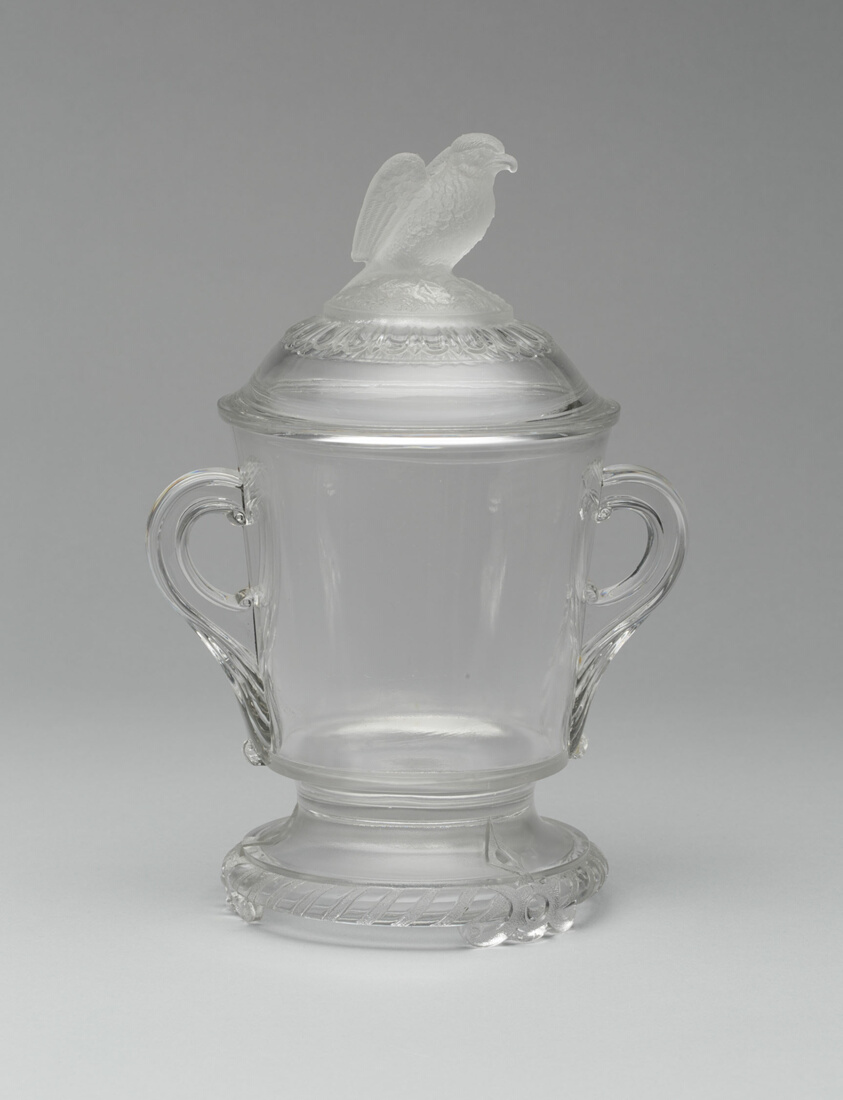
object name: Glass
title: "Old Abe/Frosted Eagle" pattern covered sugar bowl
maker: Attributed to Crystal Glass Company; Bridgeport, Ohio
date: 1880–90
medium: Glass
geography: Ohio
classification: sugar bowl; glass; american decorative arts; american arts; decorative arts